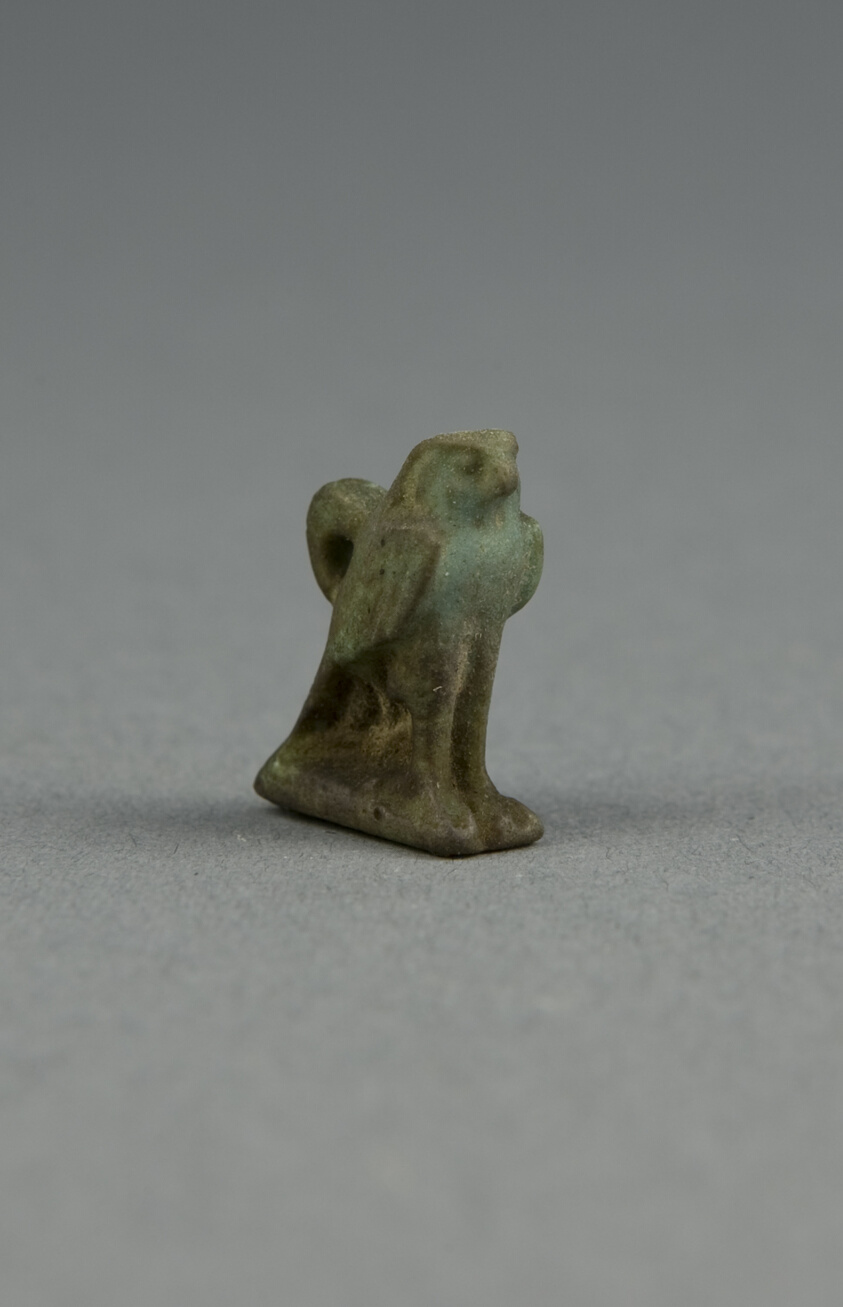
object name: Costume and Accessories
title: Amulet of a Hawk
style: third intermediate period, egyptian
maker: Egyptian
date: Third Intermediate Period, Dynasty 21–25 (1070–656 BCE)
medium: Faience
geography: Egypt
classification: amulet; jewelry; ceramics; ancient art; costume; faïence (composite material)